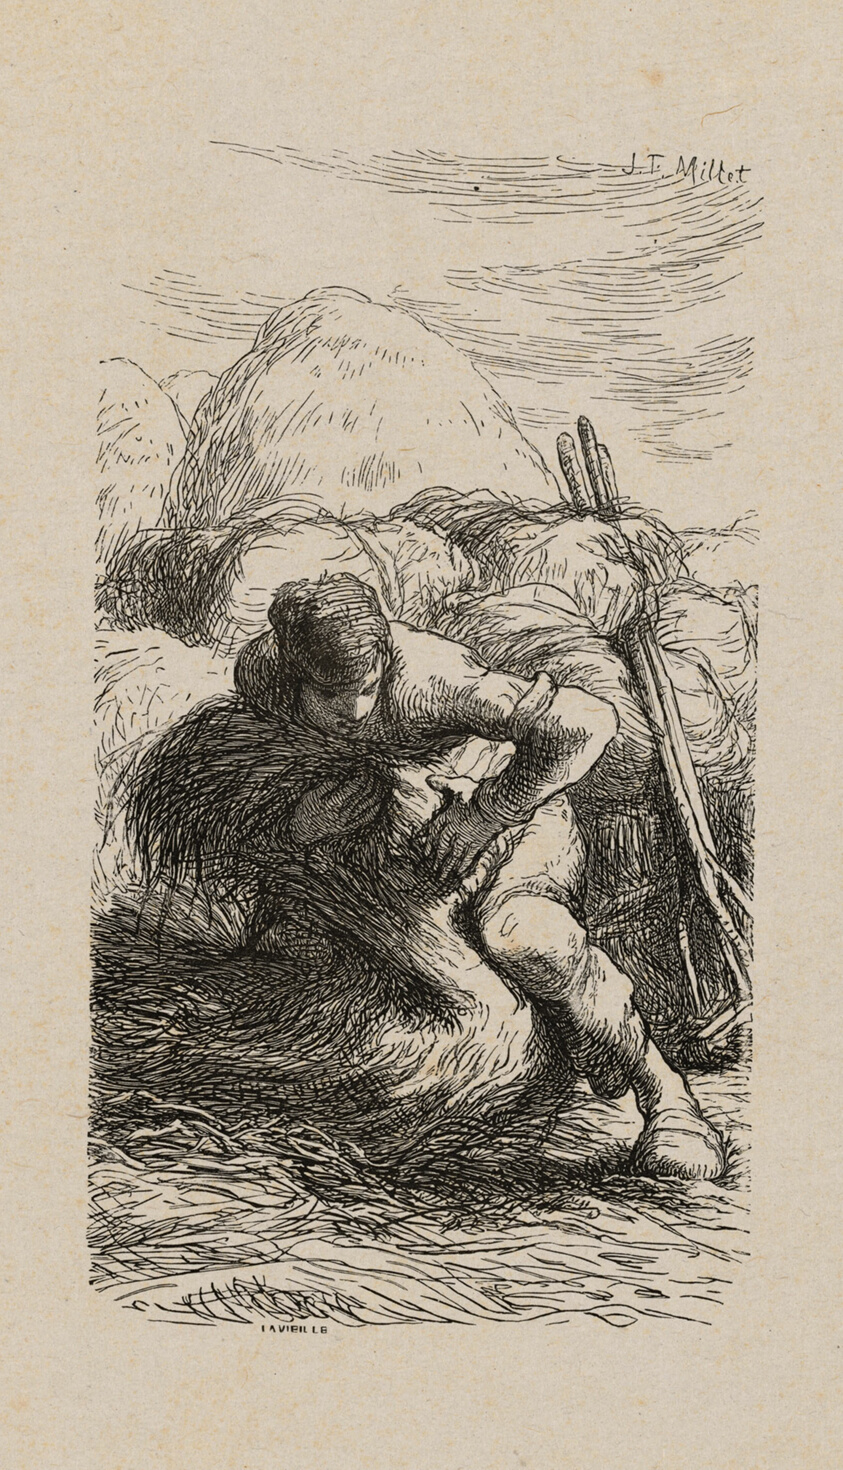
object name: Print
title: Sheaf-Binder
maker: Jacques Adrien Lavieille (French, 1818-1862); after Jean François Millet (French, 1814-1875)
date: 1853, after drawing made in 1852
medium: Wood engraving in black on gray China paper, laid down on ivory wove paper (chine collé)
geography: France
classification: wood engraving; print; prints and drawing